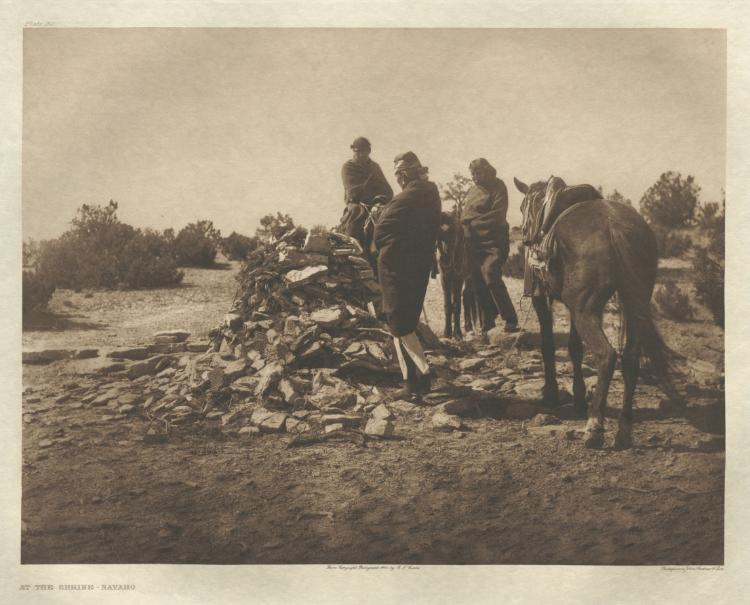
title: Portfolio I, Plate 30: At the Shrine-Navaho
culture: America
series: The North American Indian: being a series of Portfolios picturing and describing the Indians of the United States, the Dominion of Canada, and Alaska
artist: Edward S. Curtis (American, 1868–1952)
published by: The University Press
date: 1904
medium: photogravure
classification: Portfolio